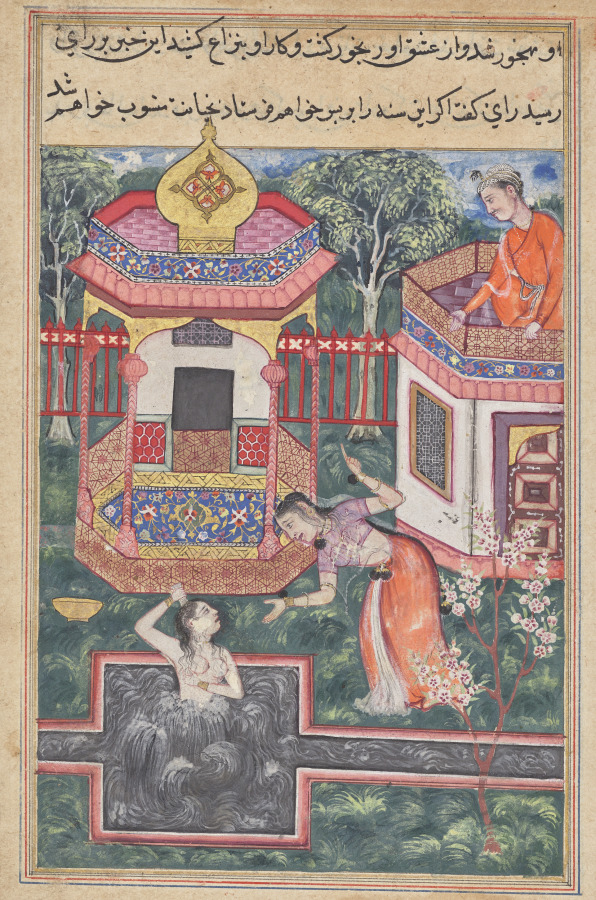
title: The son of the king of Babylon sees the Brahman transformed into a woman bathing and falls in love with her, from a Tuti-nama (Tales of a Parrot): Thirty-fifth Night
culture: Mughal India, court of Akbar (reigned 1556–1605)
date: c. 1560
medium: gum tempera, ink, and gold on paper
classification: Painting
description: One day the king’s son caught sight of a woman washing her hair and fell in love with her. She was actually a Brahmin, a Hindu priest, who had a magic pearl of transformation that allowed him to live in the women’s quarters with his lover, the princess. The princess gestures in alarm, as she realizes her brother has fallen for her lover. Another popular subject that we see in the Tuti-Nama and in later painting is women bathing in a pool. Women bathing also appear in Krishna sporting with the gopis, from the early Bhagavata Purana, CMA 1971.171. Note how the Mughal handling of water with gentle swirls differs from the concentric circles in Krishna sporting with the gopis.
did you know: The prince becomes so lovesick that he nearly dies.